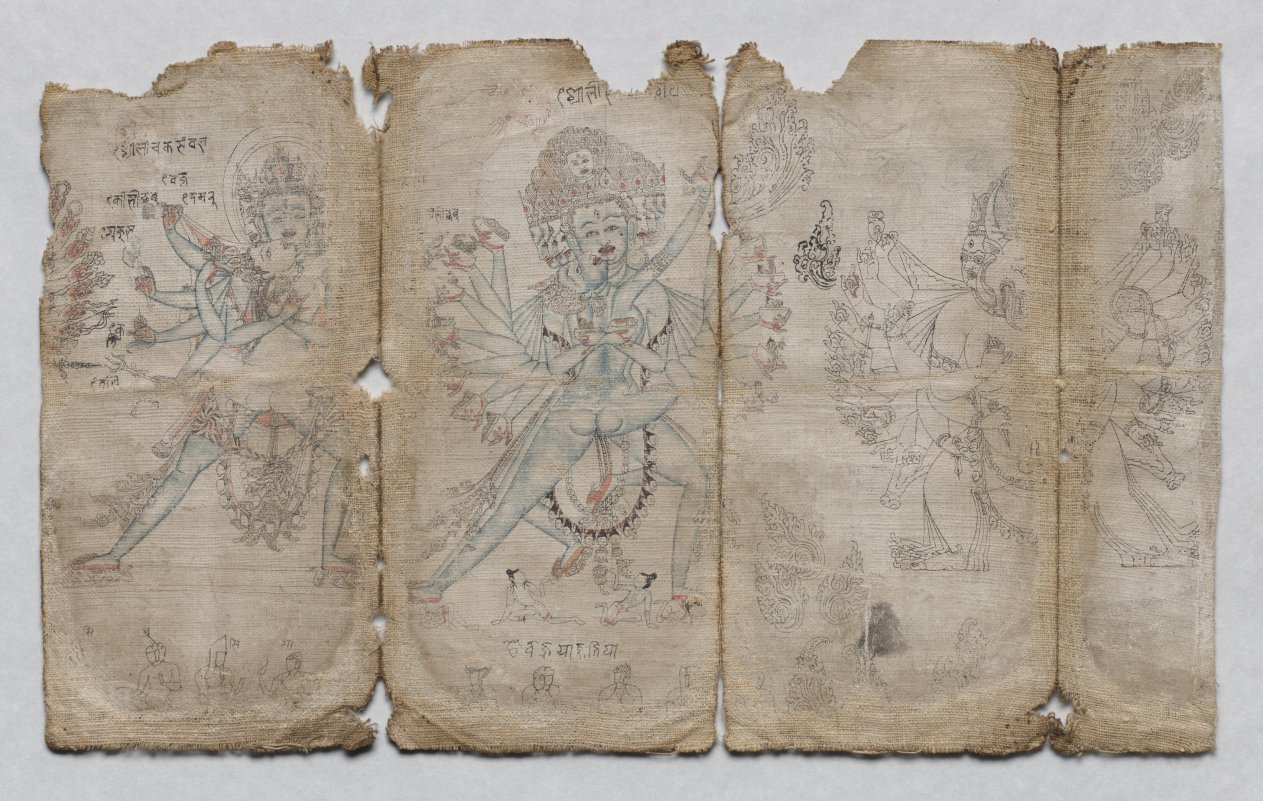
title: Iconographic Drawings: Chakrashamvara with Vajravarahi, Hevajra with Nairatmya, and Yamantaka (verso)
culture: Tibet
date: c. 1500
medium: ink and watercolor on cotton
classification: Drawing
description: These rare surviving pages of a practice book have drawings of prominent tantric figures. The line drawing is confident and masterful, with each iconographic element rendered with clarity and precision. The svelte proportions of the figures follow the style of the Khyenri school initiated in the second half of the 15th century by the artist Khyentse Wangchuk (about 1420-1500), known for his elegant and energetic depictions of the fierce manifestations of the enlightened beings. The best preserved example on this segment is the blue Hevajra in sexual union with Nairatmya, shown in a deeper shade of blue. Chakrashamvara, another powerful emanation of a Buddha, is at the left with his consort Vajravarahi, holding a variety of weapons, tantric implements, and an elephant skin representing the defeat of uncontrolled passions in his twelve hands. The buffalo-headed figure at the right is Yamantaka, a powerful form of the Bodhisattva of Wisdom. Tantric practitioners invoke this deity to aid in conquering fear of death, one of the most powerful hindrances to enlightenment.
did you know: The script notations are in an Indic script, but the line drawings are Tibetan.